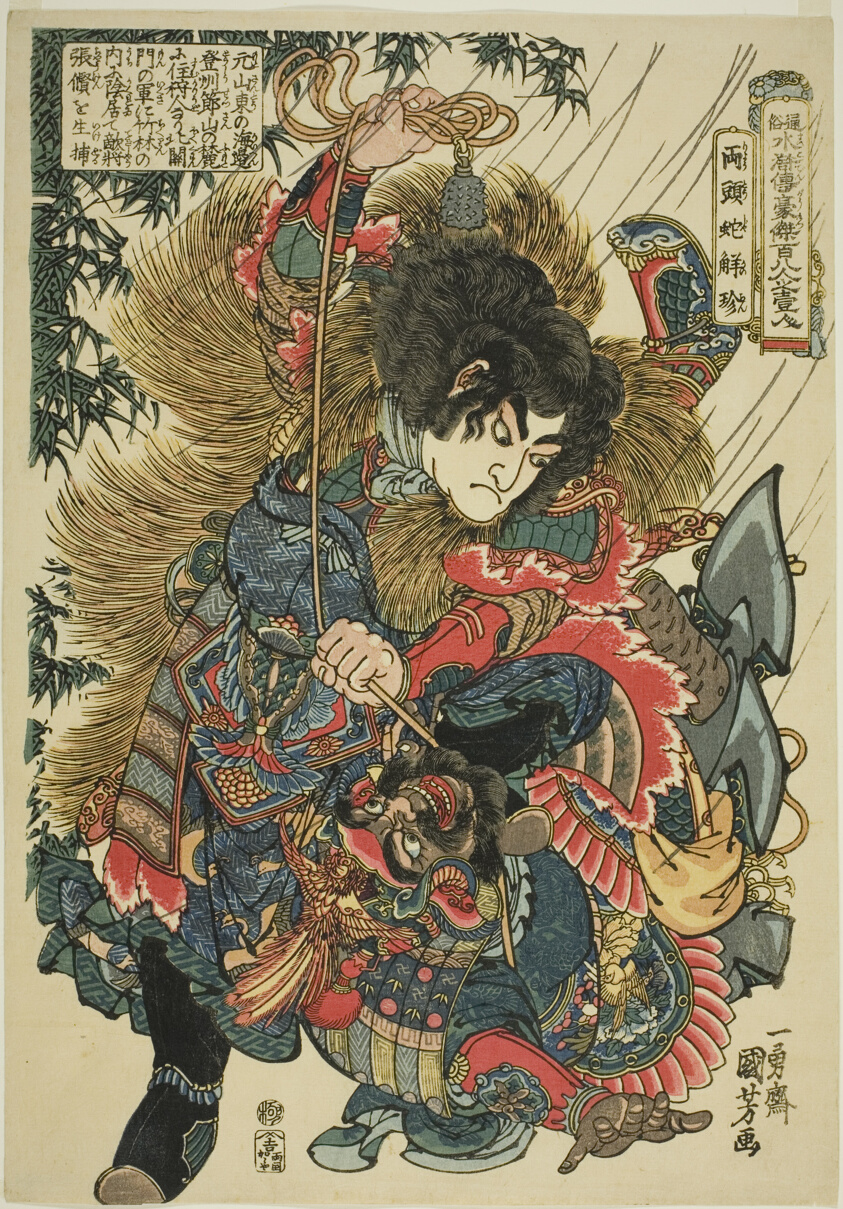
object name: Print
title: Xie Zhen (Ryotoda Kaichin), from the series "One Hundred and Eight Heroes of the Popular Water Margin (Tsuzoku Suikoden goketsu hyakuhachinin no hitori)"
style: Japanese (culture or style)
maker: Utagawa Kuniyoshi (Japanese, 1797-1861)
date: c. 1827/30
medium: Color woodblock print; oban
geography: Japan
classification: woodblock print; print; asian art